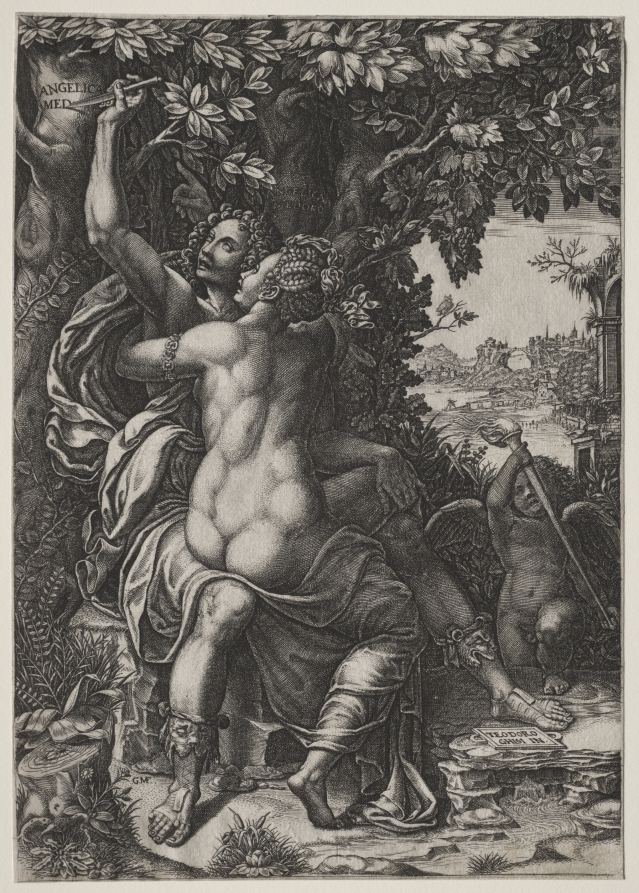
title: Angelica and Medoro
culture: Italy, 16th century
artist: Giorgio Ghisi (Italian, 1520–1582)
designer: after Teodoro Ghisi (Italian, 1536–1601)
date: c. 1570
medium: engraving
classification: Print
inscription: upper left, in plate: ANGELICA / MED ; upper center, in plate: ANGELICA / MEDORO ; lower left, in plate: GMF [in monogram] ; lower right, on tablet, in plate: TEODORO / GHISI IN. ; VERSO, upper left, in graphite: cd / Feb 5 / 1874 / [Goupil?] ; lower left, in graphite: 19.69 / [hf-?] ; lower left, in graphite: c10746 [underlined]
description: This scene stems from Ludovico Ariosto’s (1474–1533) 16th-century best-seller Orlando Furioso, an epic poem in which Princess Angelica falls in love with Medoro, a soldier she nurses back to health. They are shown here declaring their union by carving their names “on every stone or shady tree.” Like the poet Ariosto, who updated a medieval chivalric story with classical themes, Teodoro and his brother, Giorgio, portrayed the lovers in the popular antique style.